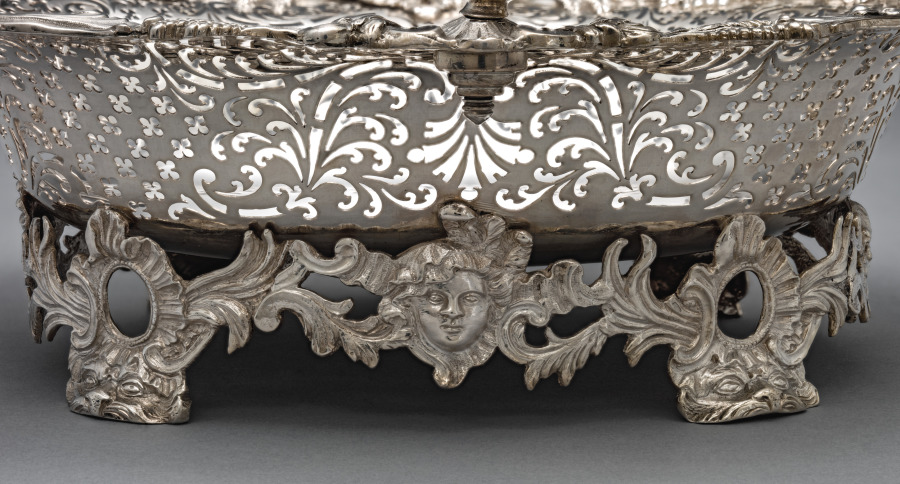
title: Cake Basket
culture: Britain, London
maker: Samuel Herbert and Company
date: 1753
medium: Silver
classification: Silver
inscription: “H/I I”; hallmark for London, George II, Samuel Herbert and Henry Bailey, and date 1753.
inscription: “To/H.H.M./from/S.K., E.W.G., J.H.J., D.R.L., M.B.R./on the occasion of his/Silver Wedding/1911-1936”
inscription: “50-2”; hallmark for London, George II, Samuel Herbert and Henry Bailey, and date 1753.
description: Drinking tea at the end of the day, accompanied by sweet cakes and savory delights, became an established ritual in Britain at all levels of society during the 1700s. In grand houses, silver teapots, caddies, and cake baskets elevated this afternoon refreshment to a formal gathering.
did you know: Sheaves of wheat adorning the rim of this basket allude to the flour used in pastries and cakes for tea.